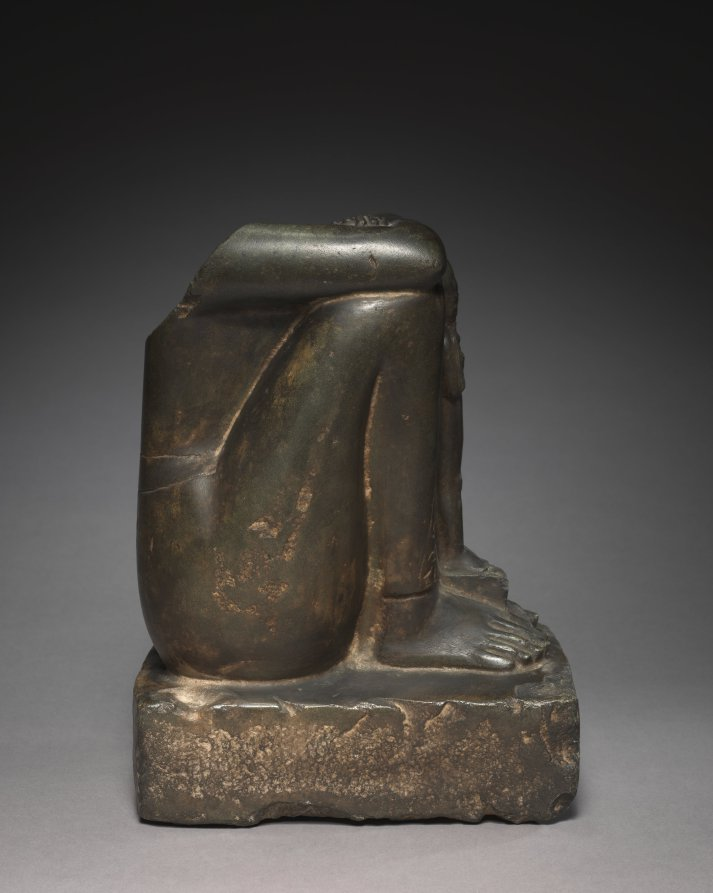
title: Block Statue of the Royal Acquaintance, Horwedja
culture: Egypt, Late period (715–332 BCE), Dynasty 26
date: 664–525 BCE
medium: graywacke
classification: Sculpture